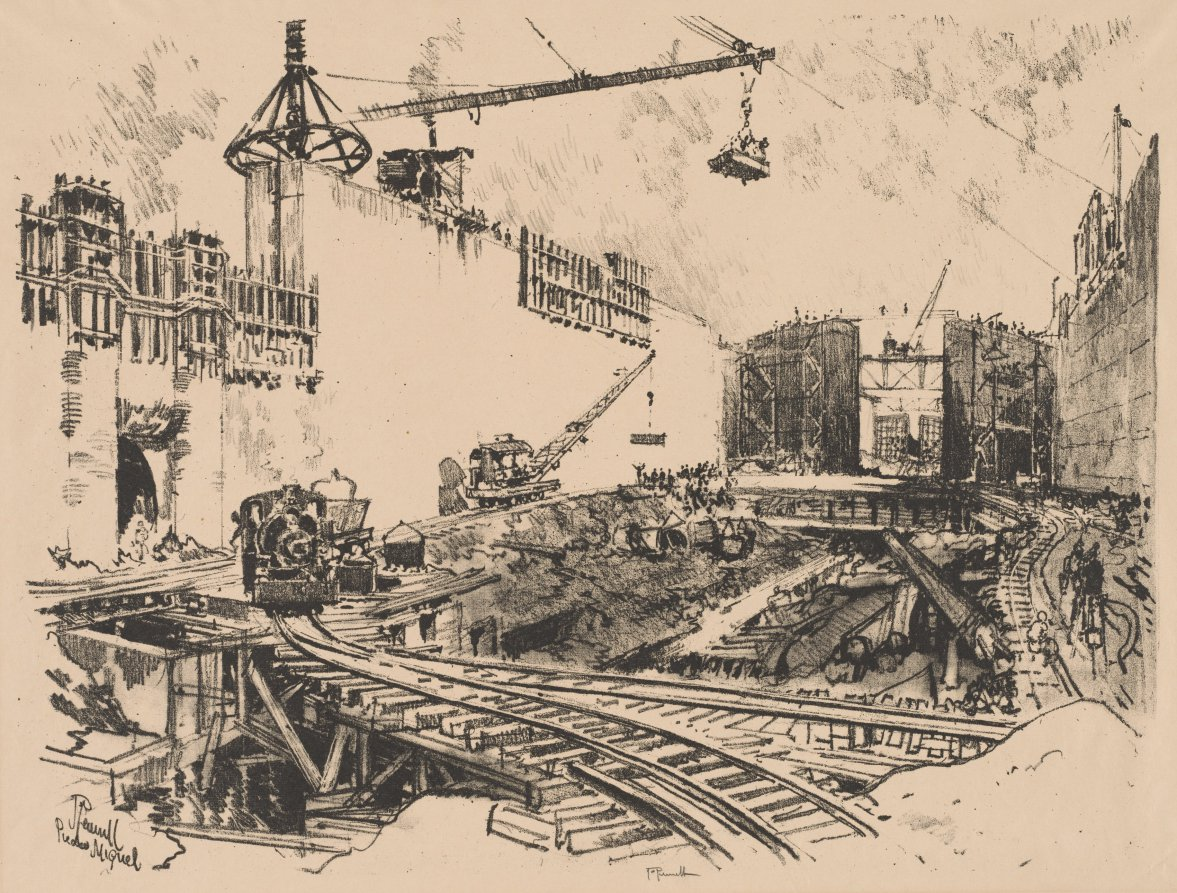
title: The Walls of Pedro Miguel Lock, Panama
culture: America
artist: Joseph Pennell (American, 1857–1926)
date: 1912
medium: lithograph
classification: Print